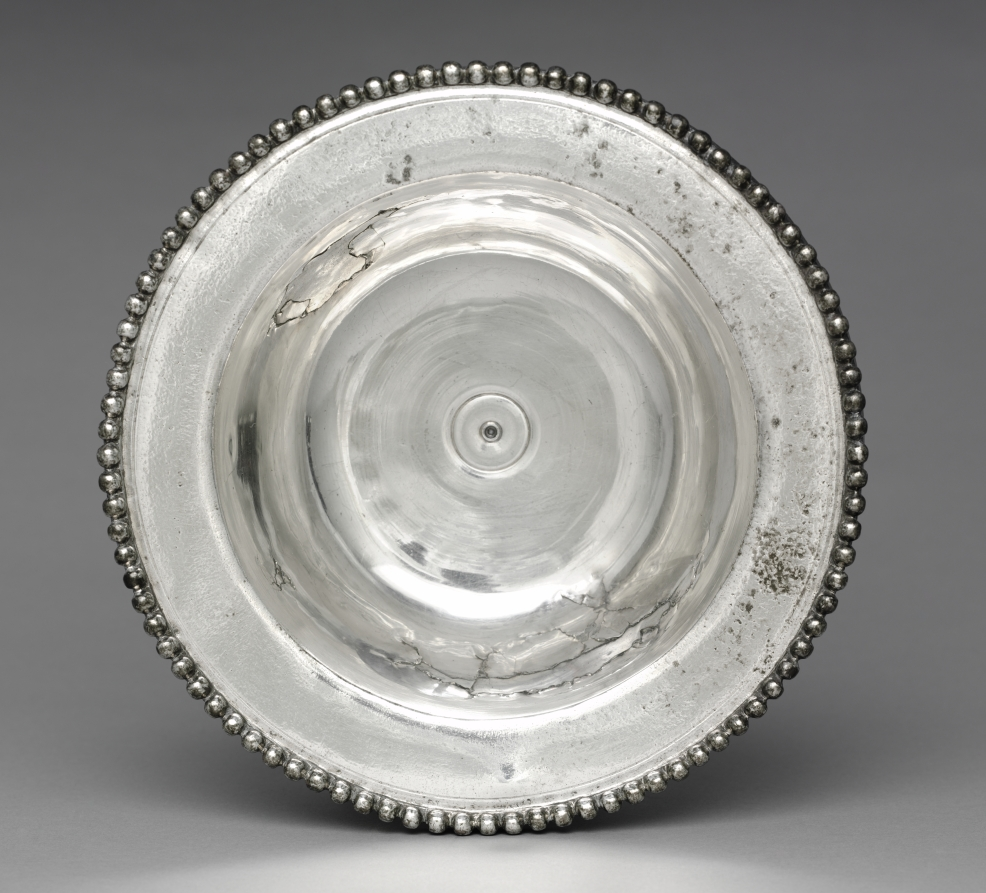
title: Bowl with Beaded Rim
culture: Byzantium, Syria(?), Byzantine period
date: 300–500 CE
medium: silver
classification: Metalwork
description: This bowl was probably intended for use in a private home, perhaps a fashionable villa on the Mediterranean coast. Wealthy Romans stored a variety of silver vessels and implements for entertaining and enjoyed using them while eating and drinking at social events. This bowl is decorated with a beaded rim, a feature often found on domestic silver bowls of this period. The basic shape was formed first by hammering. Then the bowl was polished and chased while it turned on a lathe. The beaded decoration was achieved by hammering the silver into a mold.